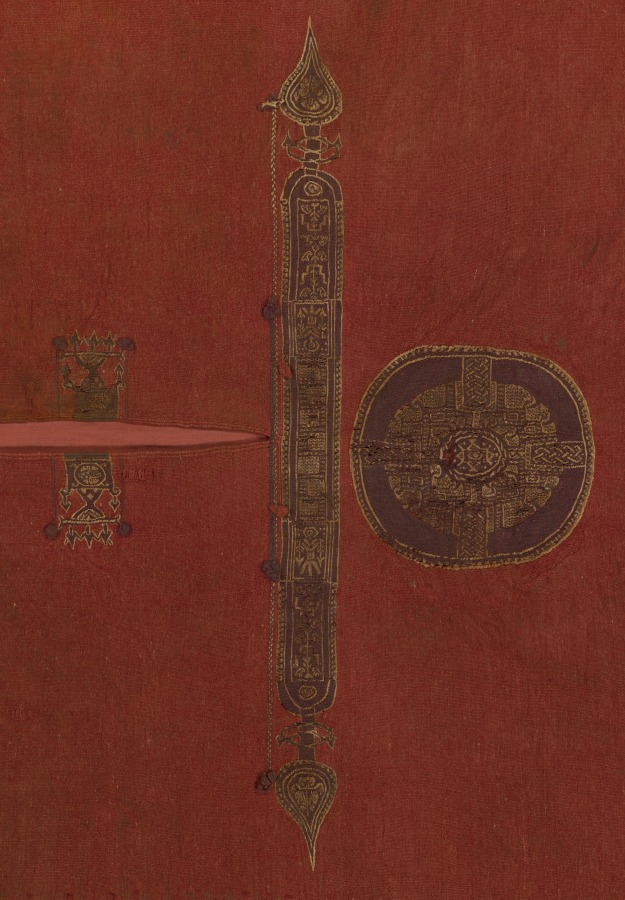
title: Luxurious Woolen Tunic with Decorated Bands and Roundels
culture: Egypt, Umayyad period (661–750)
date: 600s–700s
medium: undyed linen, dyed wool: weft-faced plain weave with slit- and dovetailed-tapestry weave, supplementary weft wrapping, embroidery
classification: Textile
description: Since the mid-200s CE tunics were the main garments worn in Egypt. This unisex tunic is decorated on the front and back with the same geometric and figural motifs, including men on horseback hunting and geometric braided knots that were believed to protect the wearer from harm. A red background was favored in the early Islamic period. Made of thick wool for cooler weather, it was woven in one complete piece with the front, back, and sleeves in this exact shape and size. The tunic’s owner repaired it on the left side and shortened it nearly two inches by sewing a fold around the waist. The discoloration and deterioration indicate the garment may have been used in a burial.